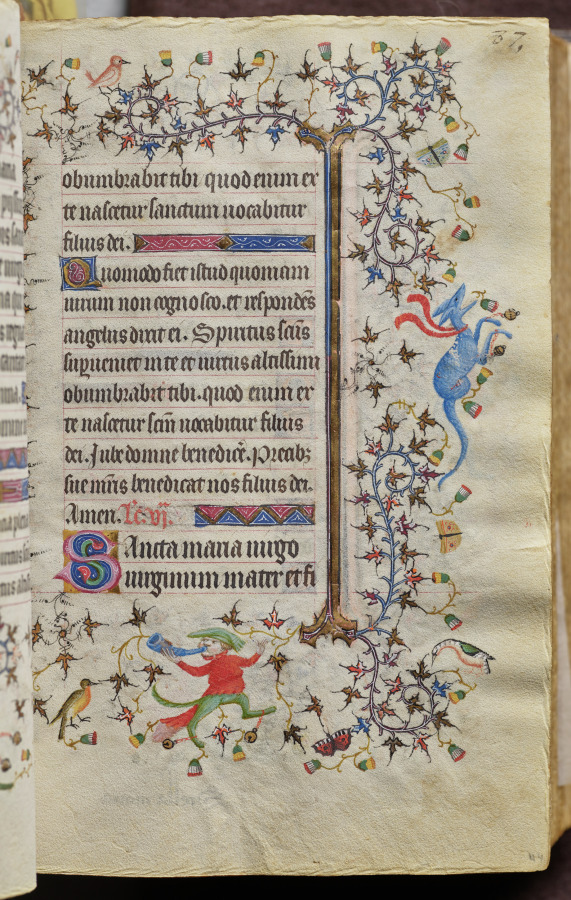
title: Hours of Charles the Noble, King of Navarre (1361-1425): fol. 44r, Text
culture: France, Paris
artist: Master of the Brussels Initials and Associates (French)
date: c. 1405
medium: ink, tempera, and gold on vellum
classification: Bound Volume